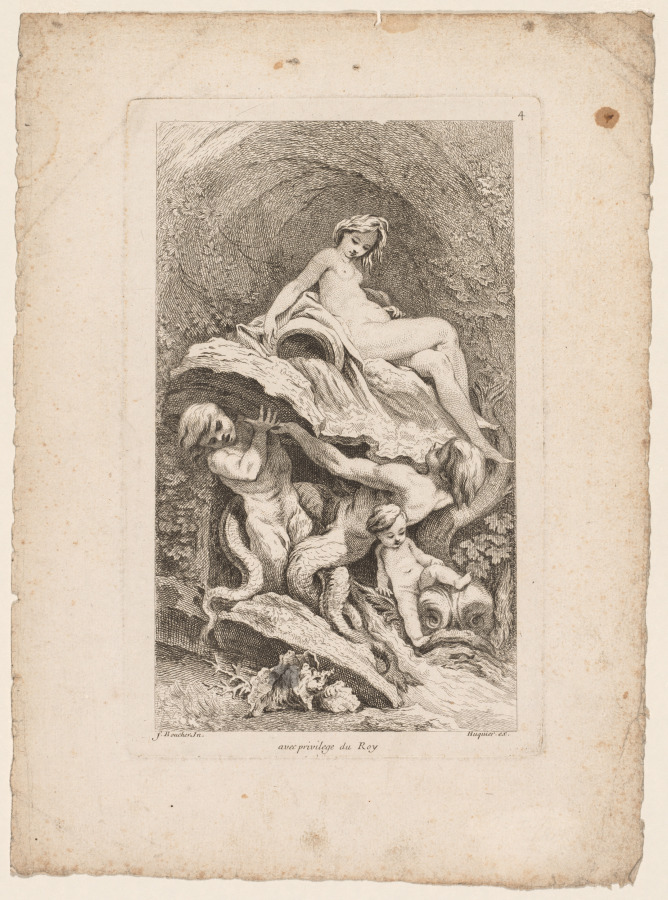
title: Book of Fountains: No. 4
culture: France, 18th century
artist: Gabriel Huquier (French, 1695–1772)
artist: after François Boucher (French, 1703–1770)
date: c. 1736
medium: etching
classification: Print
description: French prints promoting l’art rocaille (rock and shell art) or goût pittoresque (picturesque taste) quickly migrated throughout Europe and influenced the development of an international rococo style. The drawing on the left is one of Boucher’s designs for a printed suite of ornamental fountains, two of which are on display here. Boucher melds the shapes of animals, rocks, shells, mythological beasts, and humans into fanciful cascades with a sense of unstable equilibrium.